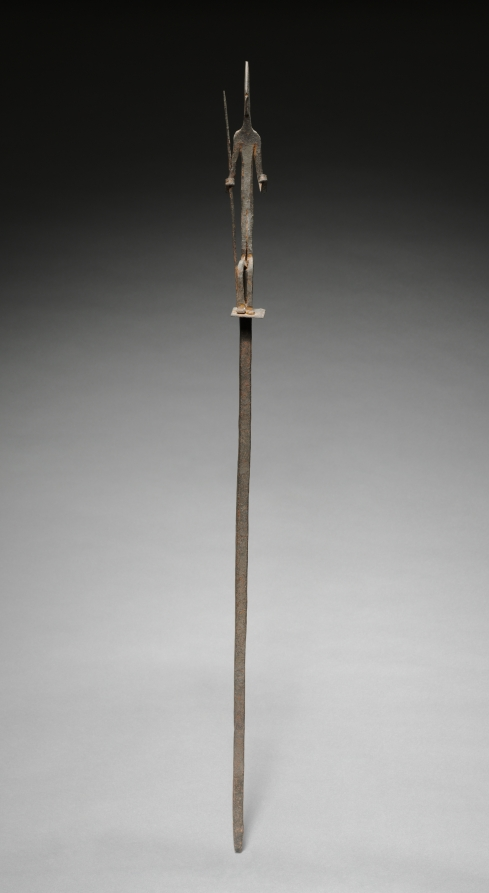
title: Staff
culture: Africa, West Africa, Mali, Bamana-style blacksmith-carver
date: 1900s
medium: Iron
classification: Implements